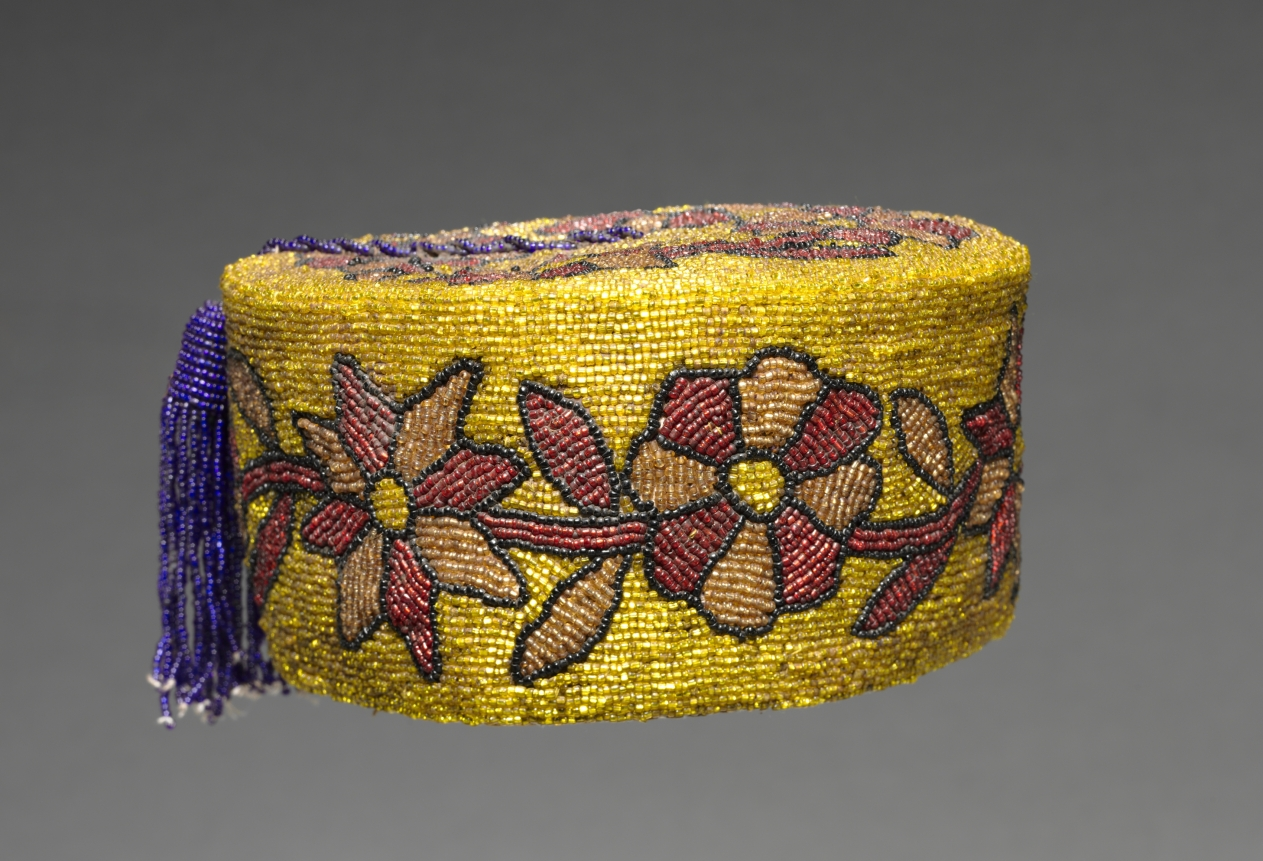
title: Coronet (oríkògbófo)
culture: Africa, West Africa, Nigeria, Yorùbá-style maker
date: 1900s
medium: Cloth, glass beads, and thread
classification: Garment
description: Like the rare conical crown (ade), the coronet (oríkògbófo) may only be worn by a king descended from Oduduwa, the first king of the Yorùbá. While the crown is reserved for special occasions, the coronet may be used by the king for less formal public events and when entertaining non-Yorùbá visitors. It signifies wealth rather than royal status.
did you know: The beads on this sculpture were imported, likely from Venice or Bohemia (now called the Czech Republic).